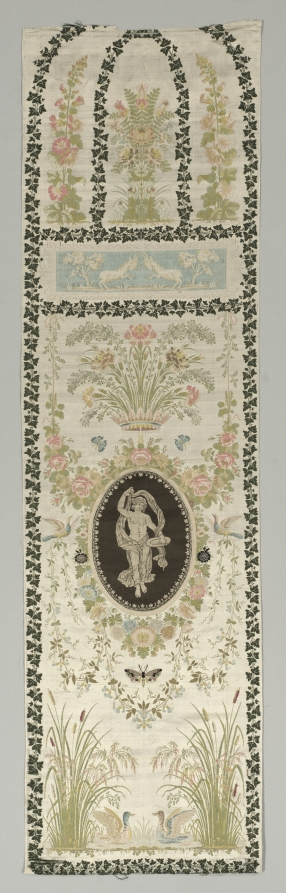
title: Wall Covering with Classical Figure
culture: France, late 18th-early 19th Century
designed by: Philippe de Lasalle (French, 1723–1805)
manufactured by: Camille Pernon & Cie (French)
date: late 1700s - early 1800s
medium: Silk: llampas (satin weave and plain weave variant), brocaded, appliquéd, embroidered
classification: Textile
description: France developed a thriving silk industry in Lyon with the goal of becoming the fashion center of Europe. Employment soared to some 20,000 workers by the time of the French Revolution in 1789. Designs changed annually, colors established new fashions, and spectacular silks were produced during the late 1700s. Philippe de Lasalle, trained as a painter by François Boucher, became the celebrated chief textile designer for Camille Pernon & Cie, purveyors to King Louis XVI (reigned 1785-90). Lasalle’s floral style with large and balanced designs, enhanced here with a fashionable classical figure, displays his preference for lighter forms without the opulent gold thread of earlier brocaded silks.